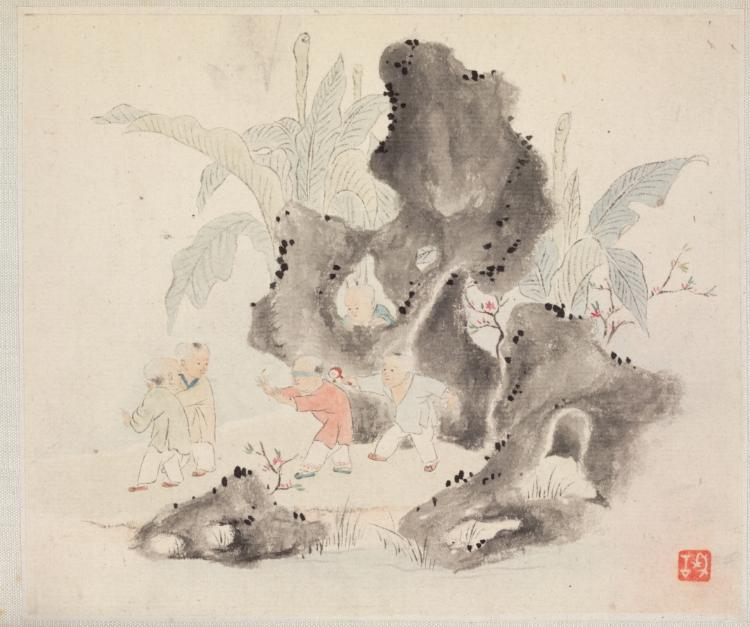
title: Album of Landscape Paintings Illustrating Old Poems: Children Playing Blindman's Buff in a Garden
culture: China, Qing dynasty (1644-1911)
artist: Hua Yan (Chinese, 1682–c. 1765)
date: 1745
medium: Album leaf; ink and light color on paper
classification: Painting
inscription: Seal, lower right corner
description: Hua Yan is one of the Eight Eccentrics of Yangzhou, who rejected orthodox ideas about painting.